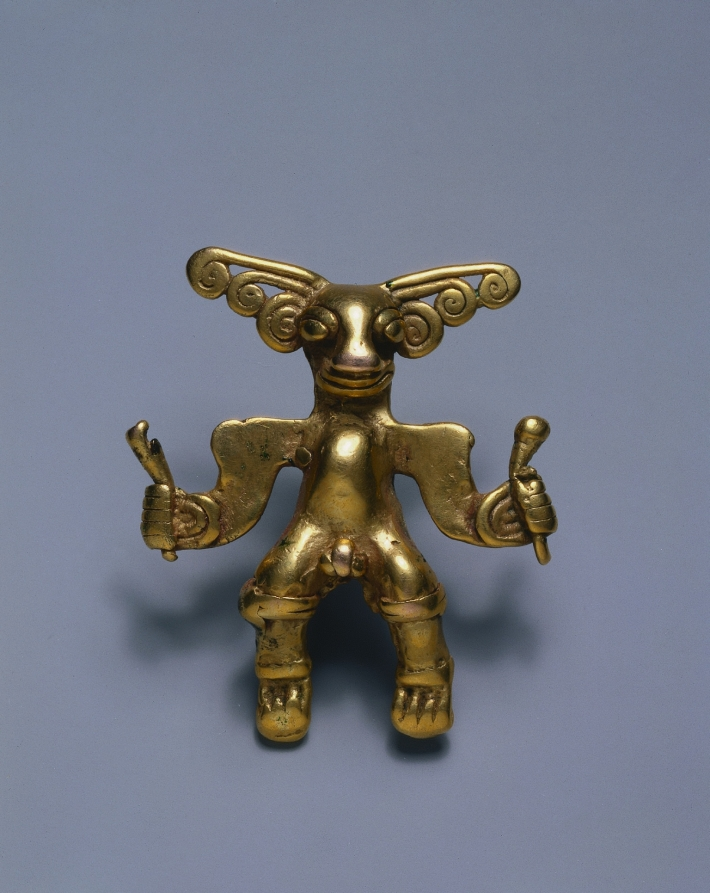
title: Figurine Pendant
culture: Western Panama, or Diquís, Costa Rica, Veraguas-Gran Chiriquí or Diquís Style, 11th-16th century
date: c. 1000–1550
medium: cast gold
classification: Metalwork